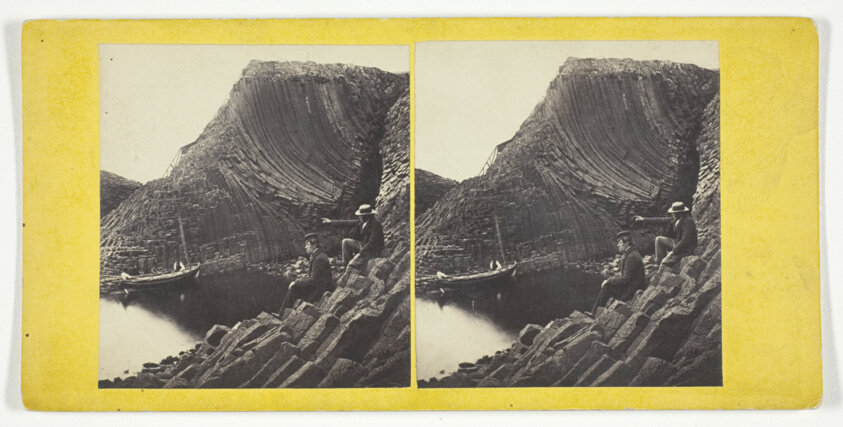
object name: Photograph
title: Clamshell Cave, Staffa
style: 19th century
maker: G. W. Wilson (Scottish, 1823–1893)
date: Mid 19th century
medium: Albumen print, stereo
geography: Scotland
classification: photography; photograph